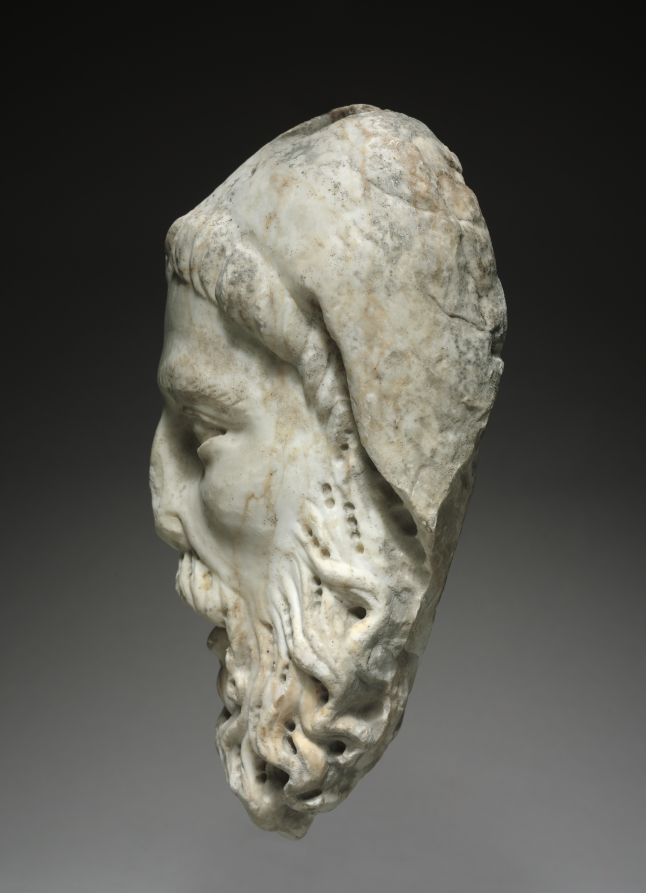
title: Head of a Prophet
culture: Italy, Siena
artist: workshop of Giovanni Pisano (Italian, c. 1240-c. 1320)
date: c. 1300–1325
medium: marble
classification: Sculpture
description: This head exhibits many of the characteristics of the style associated with the workshop of Giovanni Pisano. These are particularly noteworthy in the sensitive carving of the haunting face and its strikingly drilled beard. The head compares favorably to the sculpture made while Giovanni was master of works at Siena Cathedral (1285-97). Recent research suggests that it may once have belonged to a full-length Old Testament prophet looming on the exterior of Siena Cathedral.